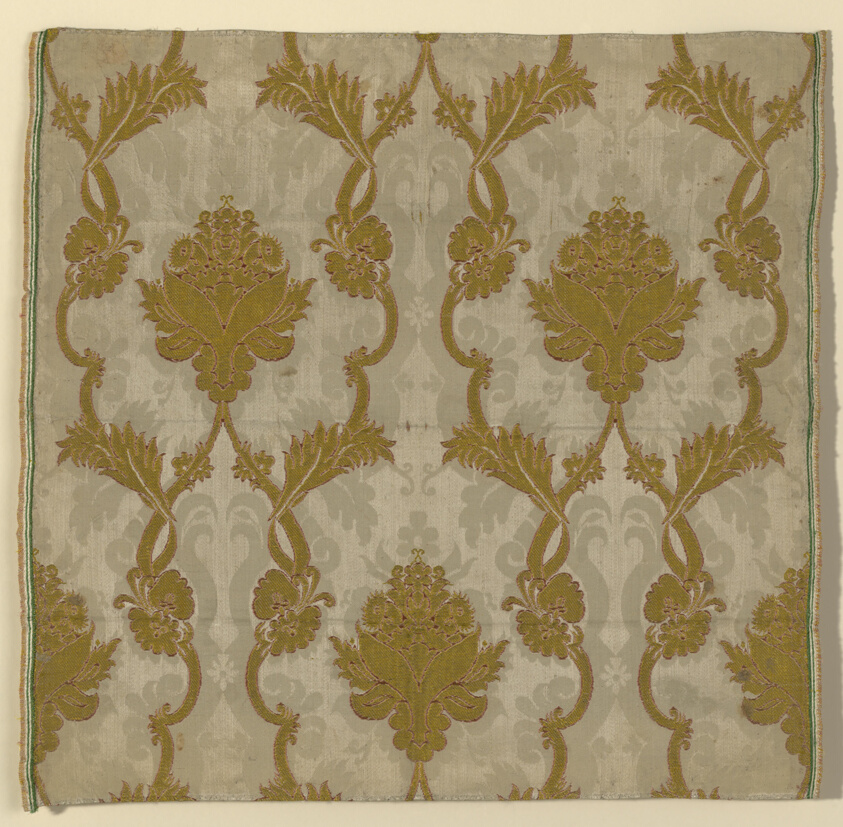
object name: Textile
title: Fragment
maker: Italy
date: 17th century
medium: Silk and gold gilt strips wound around silk fiber core, warp-float faced satin weave with supplementary brocading wefts and self-patterned by ground wefts and areas of plain weave backed by twill interlacing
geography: Italy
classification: textile; weaving